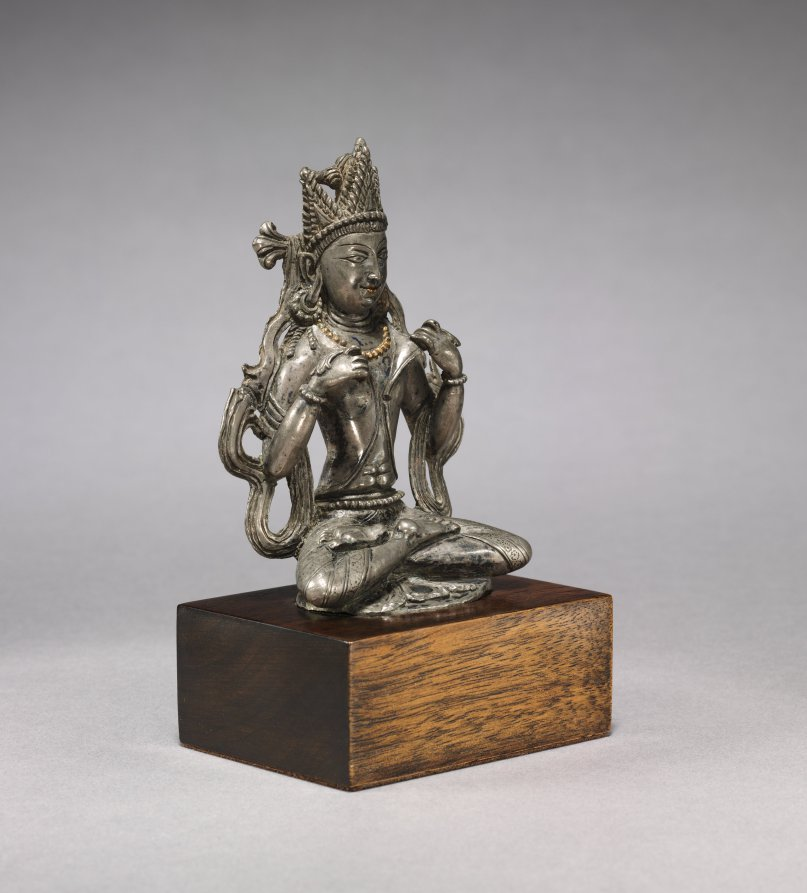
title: Bodhisattva Vajraraksha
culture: Western Tibet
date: c. 900s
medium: silver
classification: Sculpture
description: Once part of a set of sculptures depicting the enlightened beings who occupy a perfect world called the Diamond Realm (Vajradhatu), this figure holds the collar of his jacket in a gesture specific to him. An important practice in Tibetan Buddhism is the visualization of the Diamond Realm as described in texts and aided by artistic representations called mandalas. Bodhisattva Vajraraksha sits in the northern quadrant as a subsidiary figure to the Buddha Amoghasiddhi, who is green in color and quells fear.